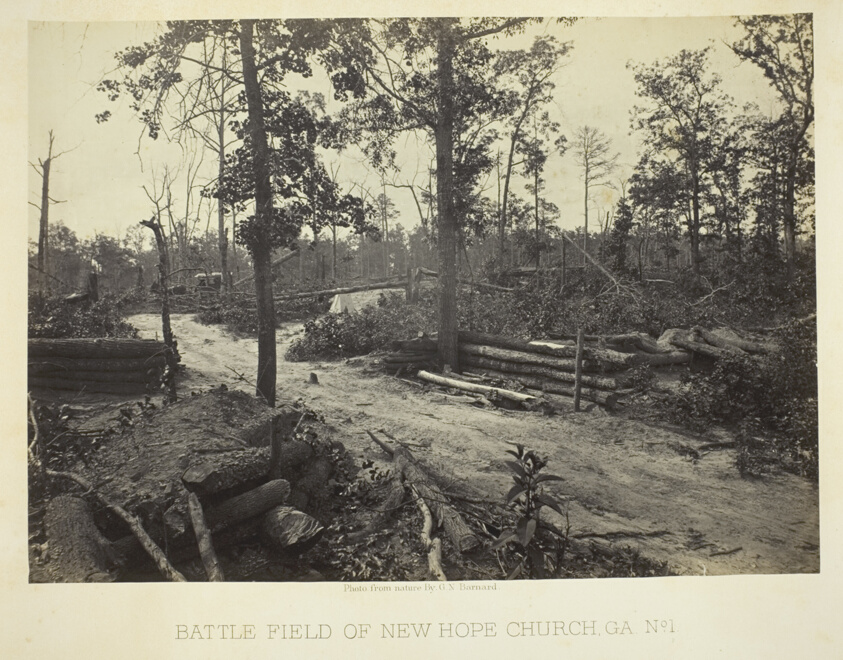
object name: Photograph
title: Battle Field of New Hope Church, GA, No. 1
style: 19th century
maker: George N. Barnard (American, 1819–1902)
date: 1866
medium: Albumen print, plate 25 from the album "Photographic Views of the Sherman Campaign" (1866)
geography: United States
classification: albumen silver print; photographic process; photography; photograph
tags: Collected by Hugh Edwards, Sherman's Campaign 1866